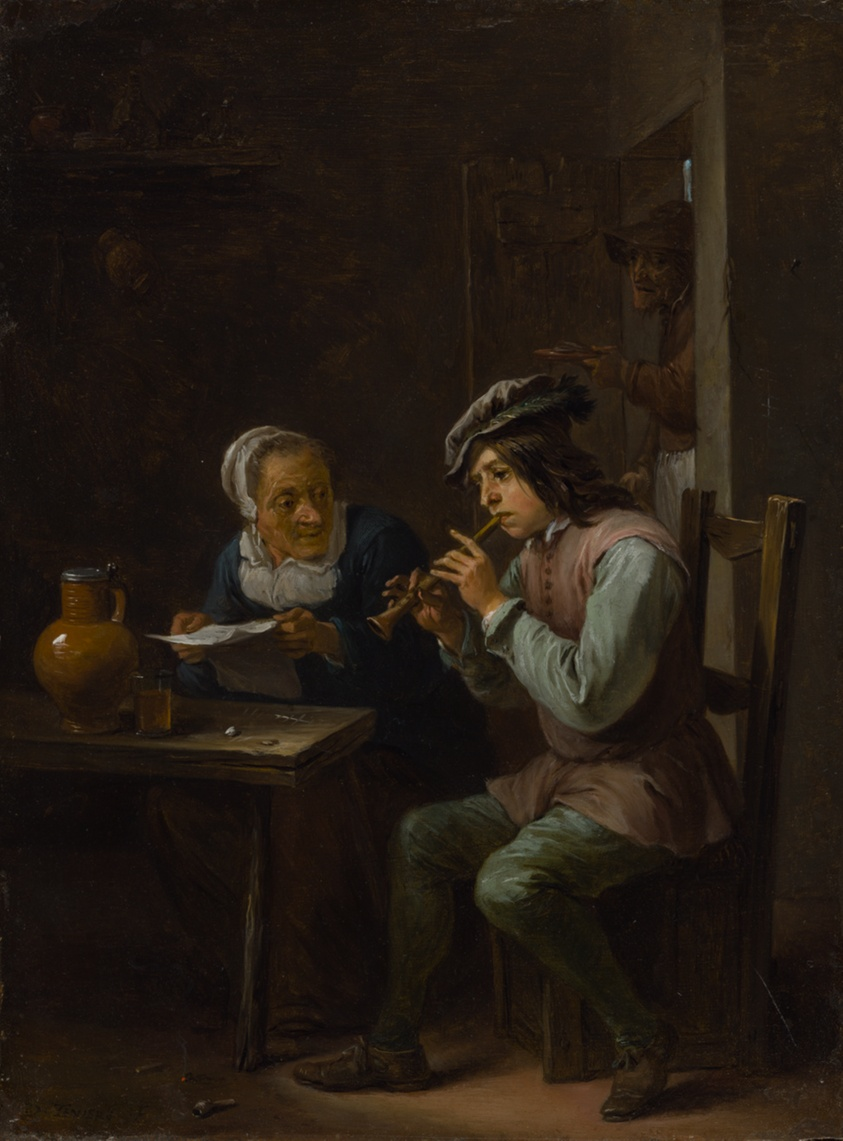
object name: Painting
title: The Flageolet Player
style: 17th Century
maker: David Teniers the Younger (Flemish, 1610-1690)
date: 1635/40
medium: Oil on panel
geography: Flanders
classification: oil on panel; oil paintings (visual works); paint; flemish; painting; european painting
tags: musical instruments, youth, woman, table, people, music, man, interior, instruments, elderly, chair, boys